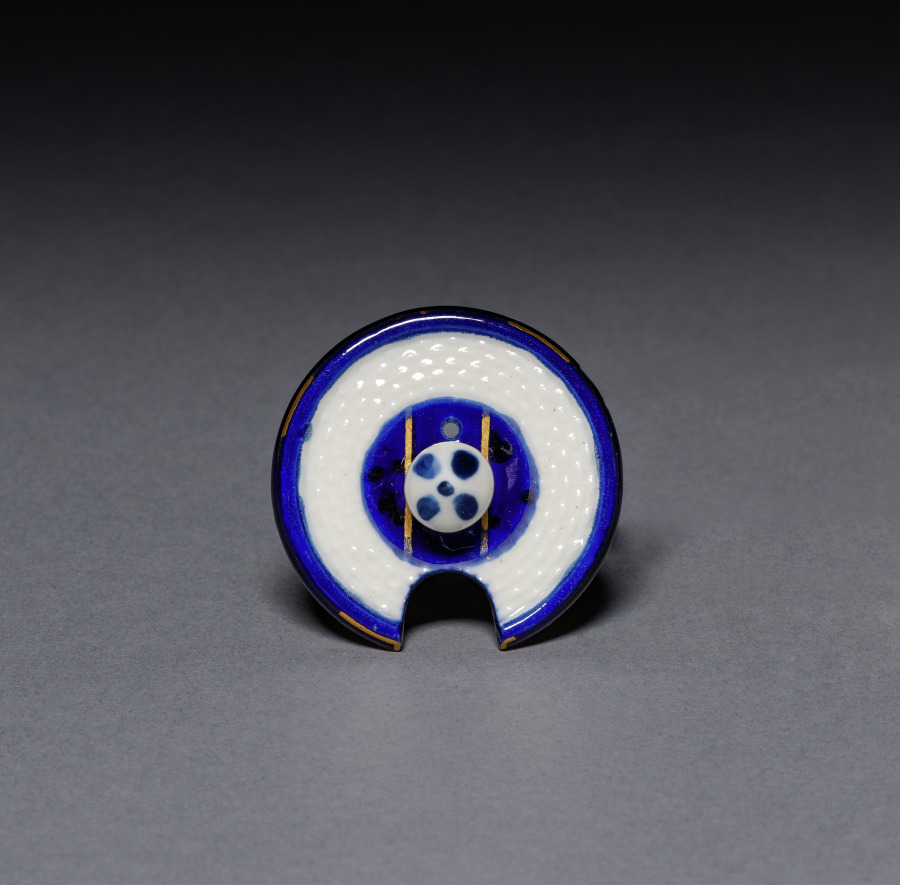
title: Cover for a Mustard Pot with Stand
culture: France, Chantilly, 18th century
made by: Chantilly Porcelain Factory (French)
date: c. 1775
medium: soft-paste porcelain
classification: Ceramic